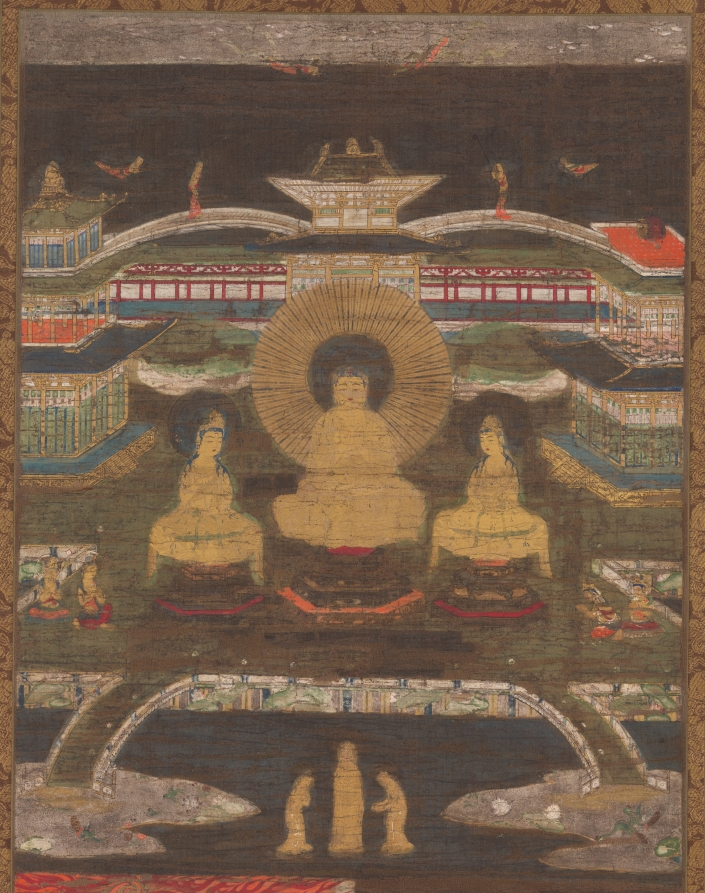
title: The White Path Between Two Rivers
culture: Japan, Kamakura period (1185–1333)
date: 1200s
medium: hanging scroll; ink, color, gold, silver, and cut gold on silk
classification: Painting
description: This painting is a visual presentation of a teaching ascribed to the Chinese Buddhist monk Shandao (善導) (613–681). It describes a challenging journey to the land of the Buddha Amida along a narrow path between a river of fire and a river of water. The story is about escaping the six paths of reincarnation—the heavens and hells, as well as the realms of humans, animals, hungry ghosts, and fierce beings. The Buddha Amida appears at the top in his Pure Land, or Western Paradise.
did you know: The Six Realms of Transmigration are the: heavenly realm, hells, human realm, animal realm, realm of hungry ghosts, and realm of fierce beings.